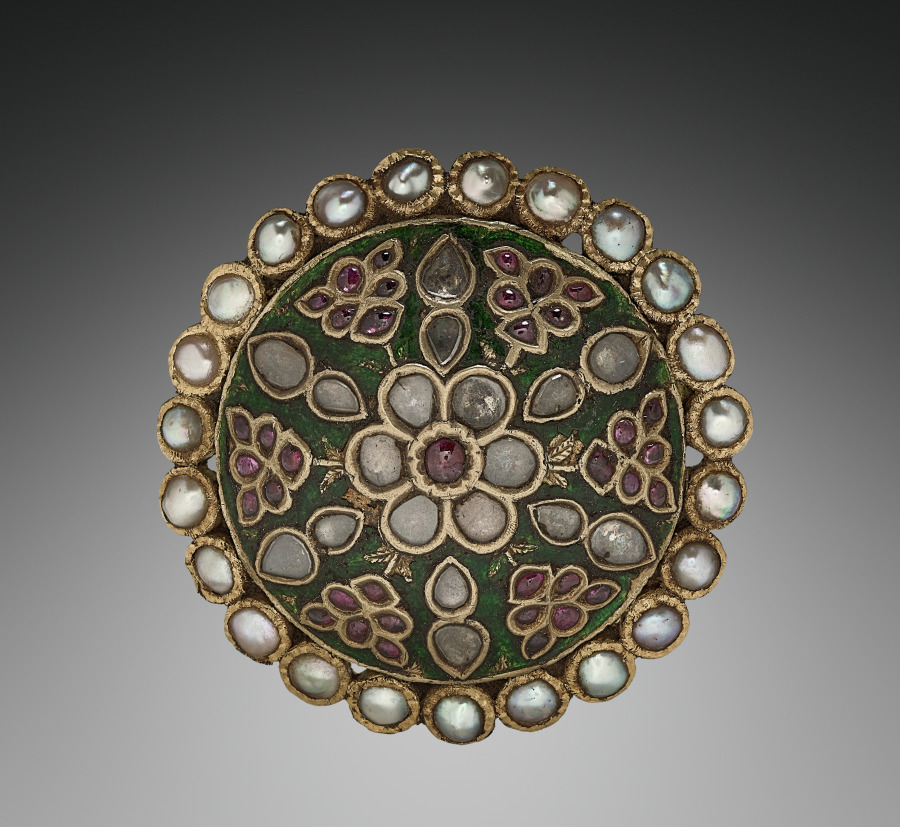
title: Ornament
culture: India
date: 1800s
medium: Gold with green enamel ground, white sapphires, rubies, and pearls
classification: Jewelry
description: Circular ornaments were worn as pendants, sewn onto textiles, or pinned into hair. The decorative motif made of colorful gems depicting flowering plants was introduced during the reign of the Mughal emperor Shah Jahan (1628–58) and remained popular through the 1800s.